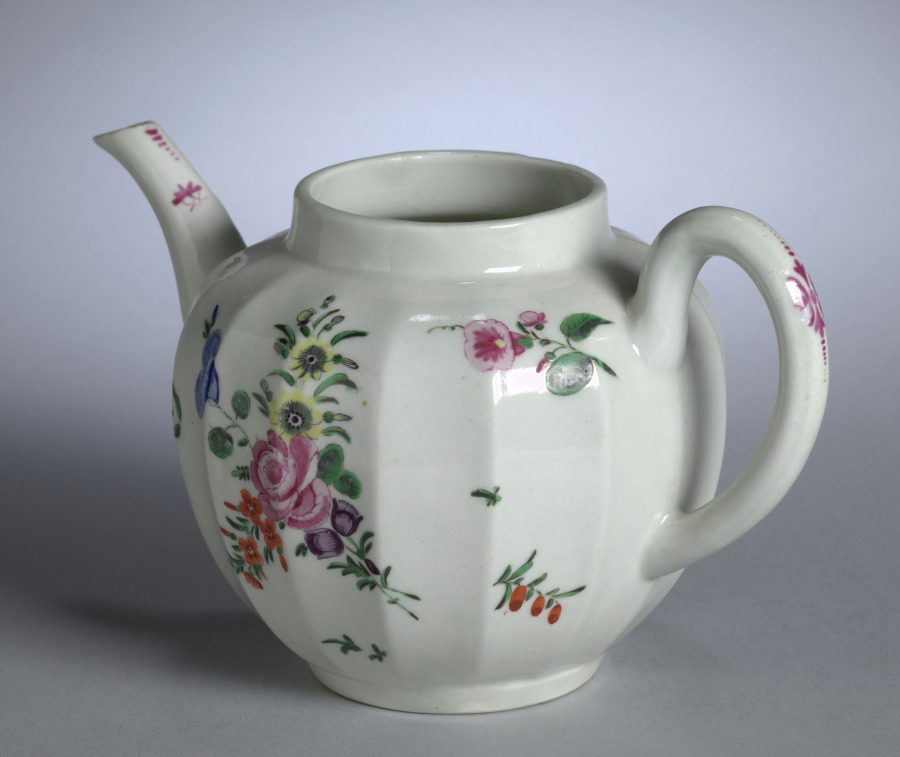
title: Teapot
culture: England, Worcester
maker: Worcester Porcelain Factory (British, established 1751)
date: c. 1755–75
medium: porcelain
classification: Ceramic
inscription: Mark on the bottom - An X with radiating lines inside a box.